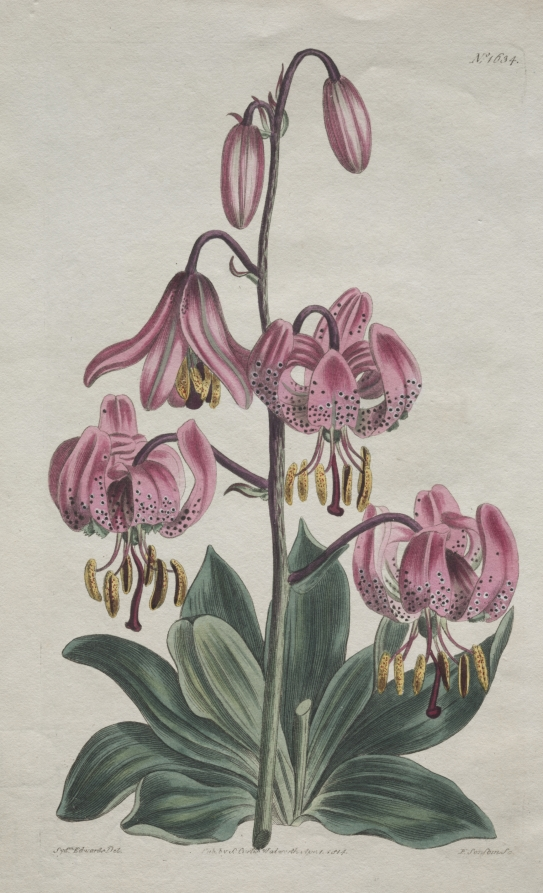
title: The Botanical Magazine or Flower Garden Displayed: Smooth-stalked Martagon, Turk's Cap Lily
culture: England, 19th century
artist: S. Curtis (British)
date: 1814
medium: engraving, hand-colored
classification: Print